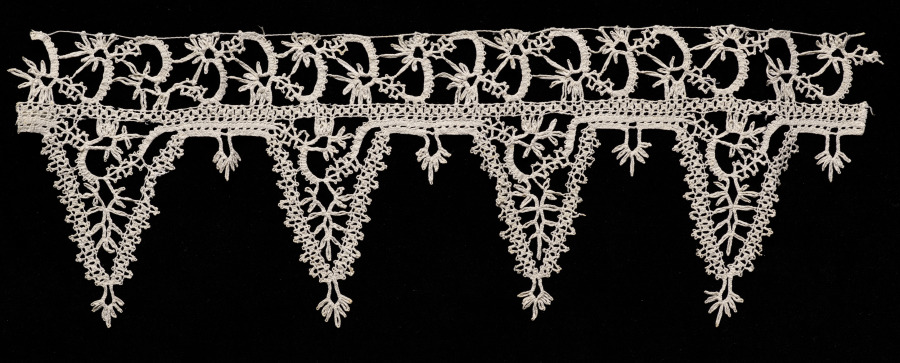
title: Lace Insertion and Edging of Points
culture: Italy, Venice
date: 1600–1640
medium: Bobbin lace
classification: Lace